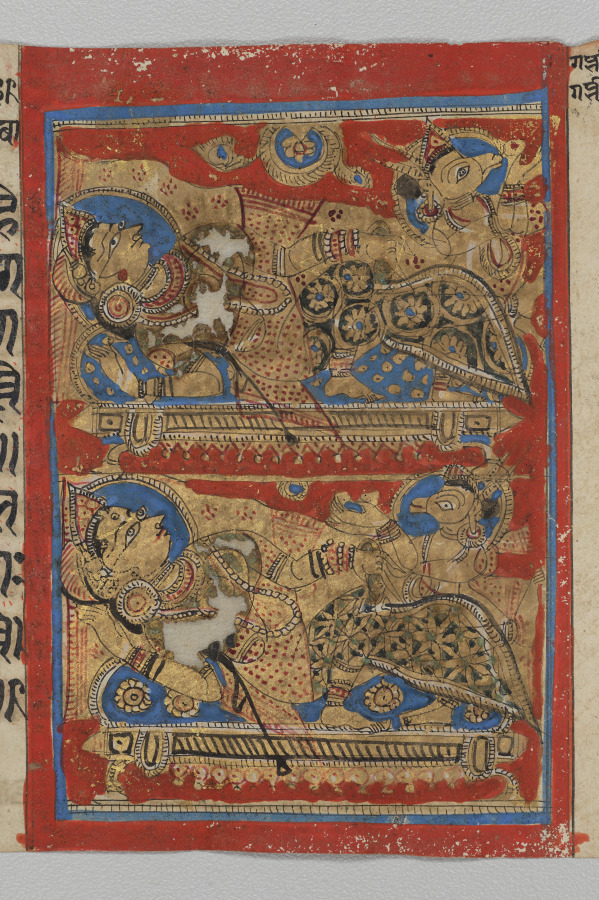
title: Transfer of the Embryo of Mahavira, Folio 12 (recto), from a Kalpa-sutra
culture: Western India, Gujarat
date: c. 1475–1500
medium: Gum tempera, ink, and gold on paper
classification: Painting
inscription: [[upper right]] garbhāpahāra/garbhasaṃvaraṇa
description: The tiny captions written in Sanskrit to the right of the painting identify the subject of this scene: “abduction of the embryo” and “transfer of the embryo.” The embryo is the unborn founder of the Jain religion. In this miraculous episode, a goat-headed divinity who presides over miscarriage and childbirth gently takes the embryo in his cupped hands away from the reclining Brahmin lady in the scene above. Below, he carries it to a queen, who will be the birth mother.